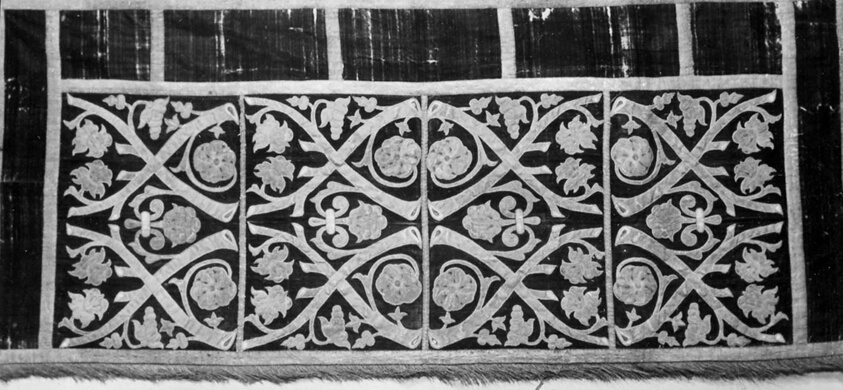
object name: Religious/Ritual Object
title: Altar Frontal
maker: Spain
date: 17th century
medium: Green velvet with conventional baroque interlacing flower and stem design in appliqué; red velvet borders, top and sides; red and black embroidered design; metal fringe does not appear to be of the period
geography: Spain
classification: textile; needlework (visual works); liturgical; weaving; altar; ritual objects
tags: altar